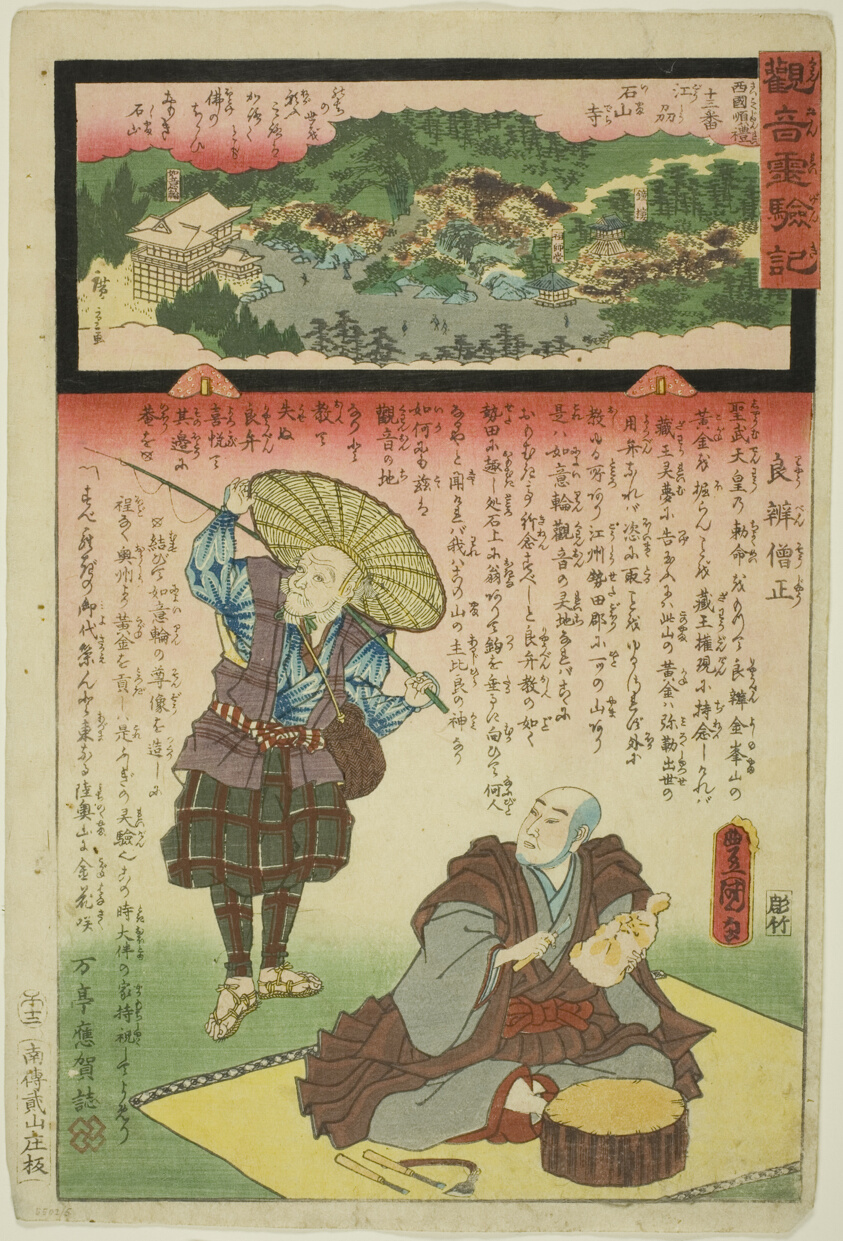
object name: Print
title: Ishiyama Temple in Omi Province, No. 13 on the Saikoku Pilgrimage Route (Saikoku junrei jusanban Koshu Ishiyamadera), from the series "The Miracles of Kannon (Kannon reigenki)"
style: Japanese (culture or style)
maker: Utagawa Kunisada I (Toyokuni III); Japanese, 1786-1864; Utagawa Hiroshige II (Shigenobu); Japanese, 1826–1869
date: 1858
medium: Color woodblock print; oban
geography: Japan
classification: woodblock print; print; asian art